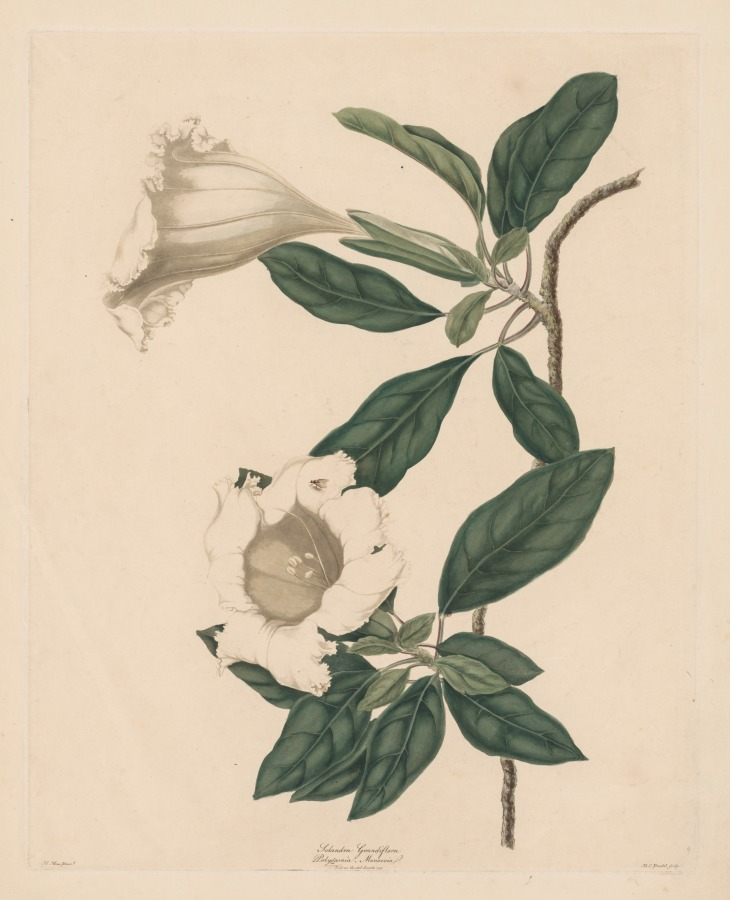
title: Chalice Vine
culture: Germany, worked in London, 18th century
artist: Maria Catharina Prestel (German, 1747–1794)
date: 1790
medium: etching and aquatint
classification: Print